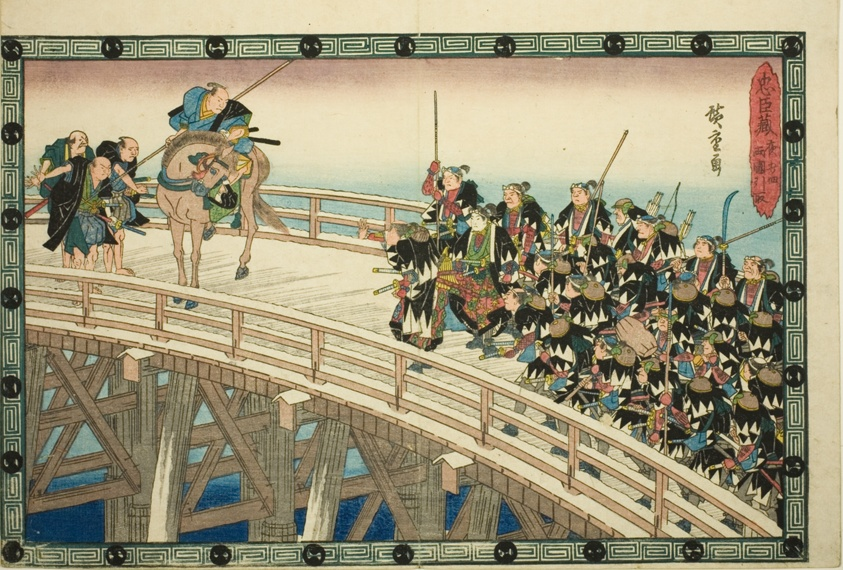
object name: Print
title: The Night Attack, Part 4 [sic; actually 5]: The Retreat across Ryogoku Bridge (Youchi yon, Ryogoku hikitori), from the series "The Revenge of the Loyal Retainers (Chushingura)"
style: Japanese (culture or style)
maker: Utagawa Hiroshige 歌川 広重; Japanese, 1797-1858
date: c. 1834/39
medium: Color woodblock print; oban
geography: Japan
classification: woodblock print; print; asian art